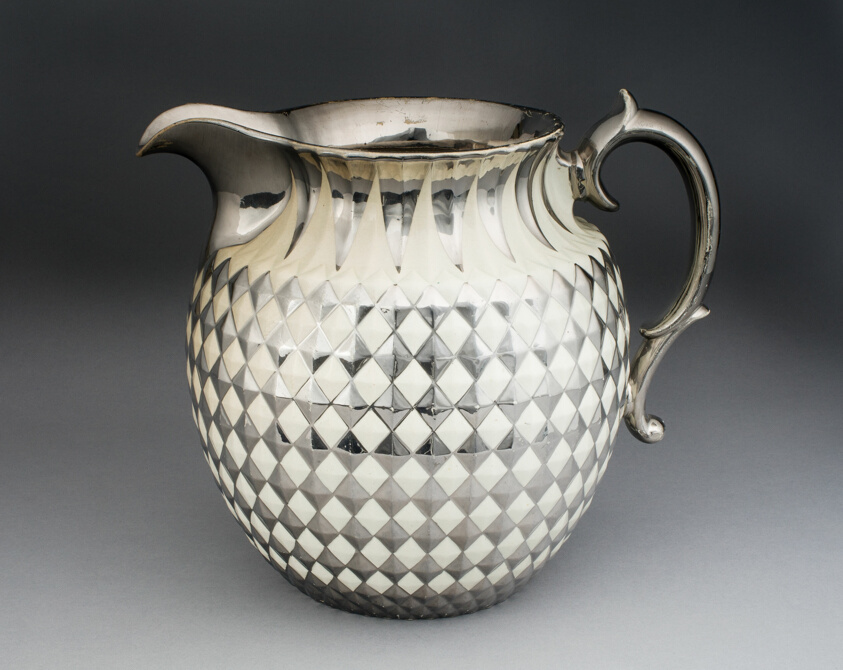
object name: Ceramics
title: Pitcher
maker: England, Staffordshire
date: 1810/20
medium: Lead-glazed earthenware with lustre decoration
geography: Staffordshire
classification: pitcher (vessel); porcelain; vessel; european decorative arts; ceramics